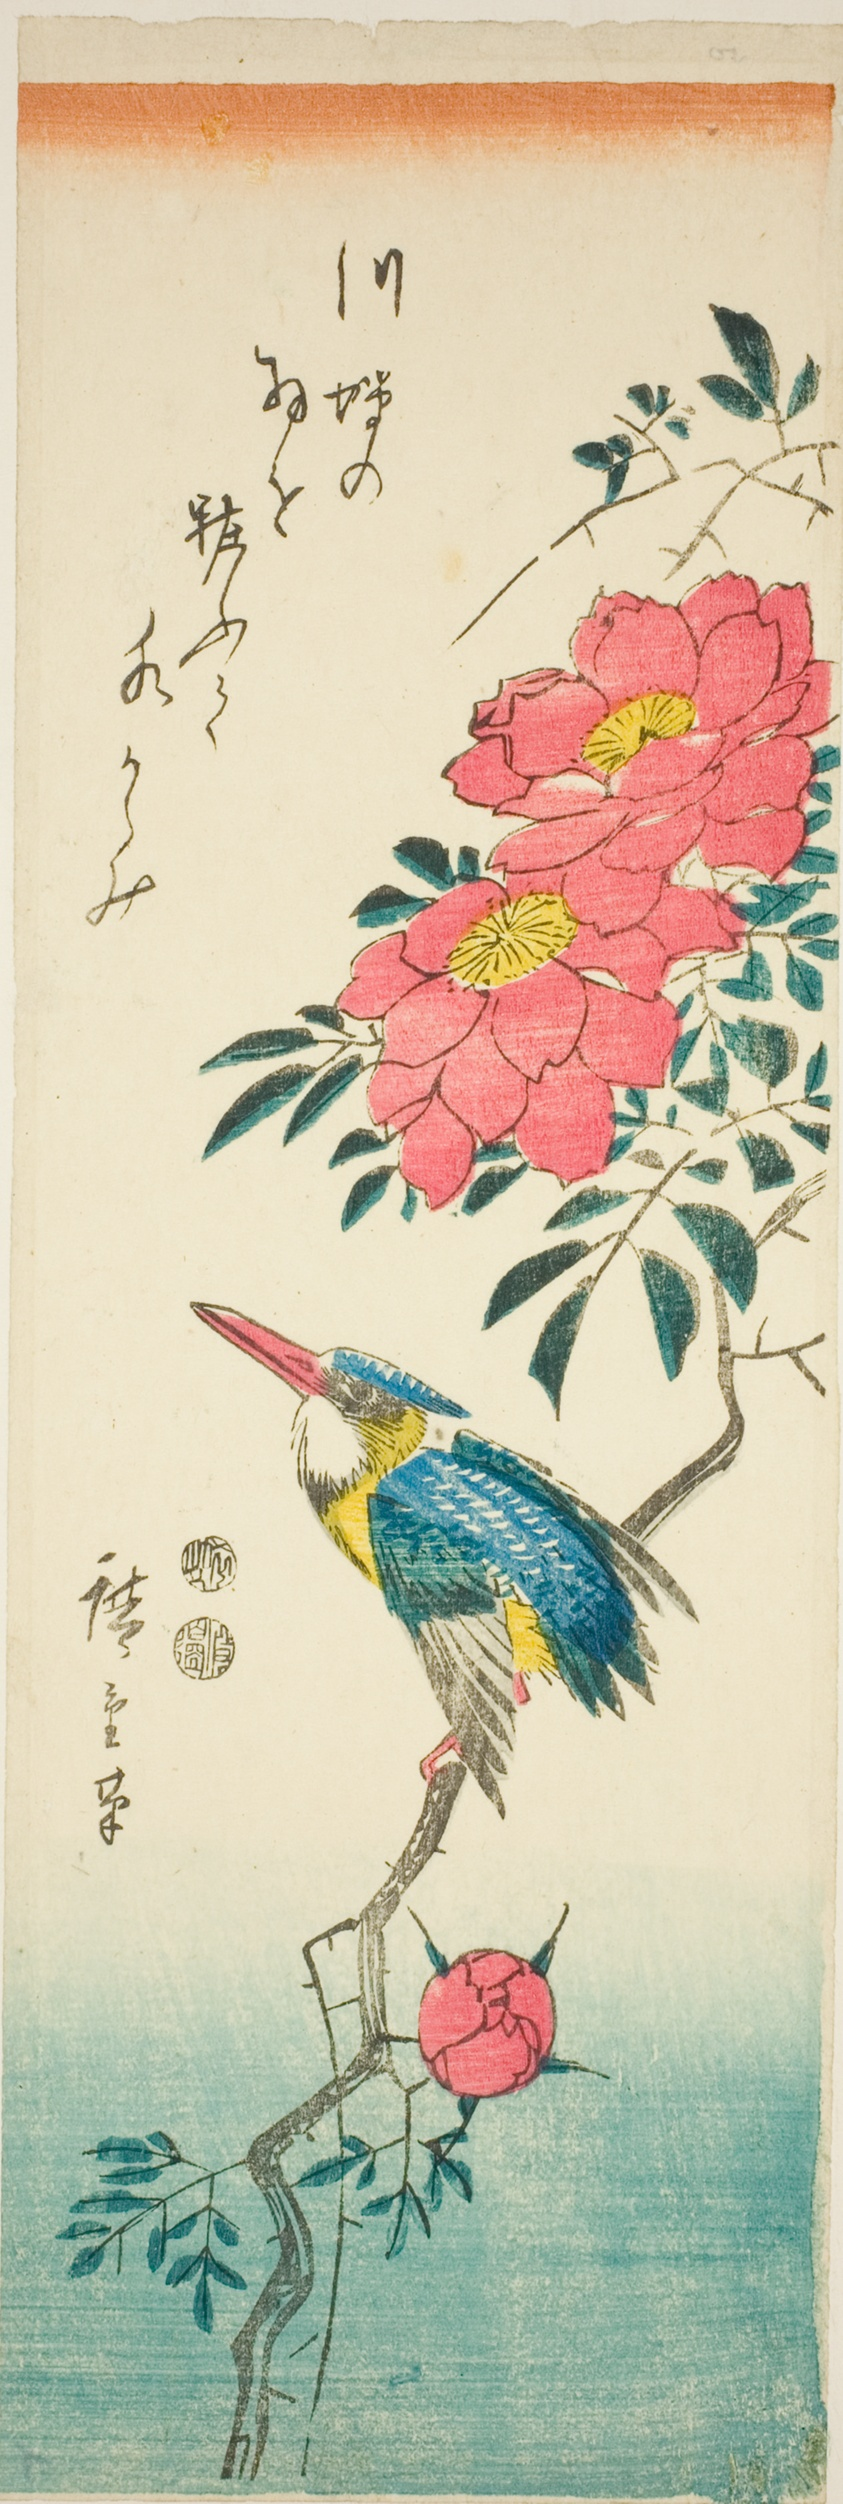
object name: Print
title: Kingfisher and roses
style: Japanese (culture or style)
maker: Utagawa Hiroshige 歌川 広重; Japanese, 1797-1858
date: c. 1847/52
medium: Color woodblock print; aitanzaku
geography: Japan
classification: woodblock print; print; asian art